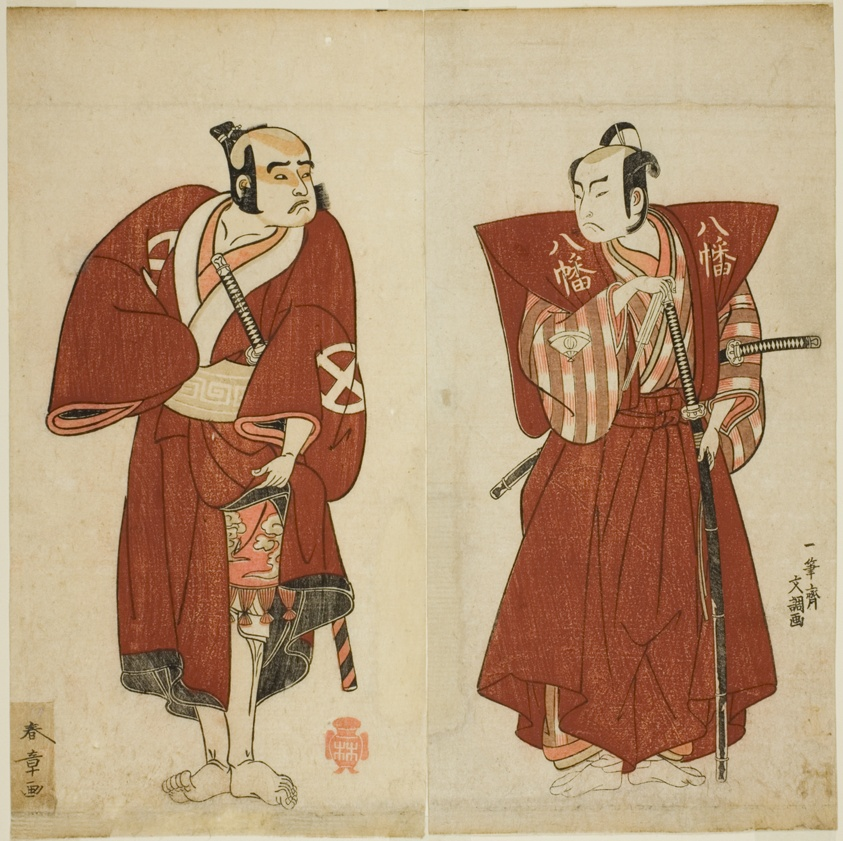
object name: Print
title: The Actors Onoe Matsusuke I as Yawata no Saburo (right), and Otani Tomoemon I as the Yakko Emohei (left), in the Play Myoto-giku Izu no Kisewata, Performed at the Ichimura Theater in the Eleventh Month, 1770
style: Japanese (culture or style)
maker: Katsukawa Shunsho; Japanese, 1726-1792; Ippitsusai Buncho; Japanese, active c. 1755-90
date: c. 1772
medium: Color woodblock print; diptych; illustrations from the later edition of the book Ehon Butai Ogi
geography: Japan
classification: woodblock print; print; asian art